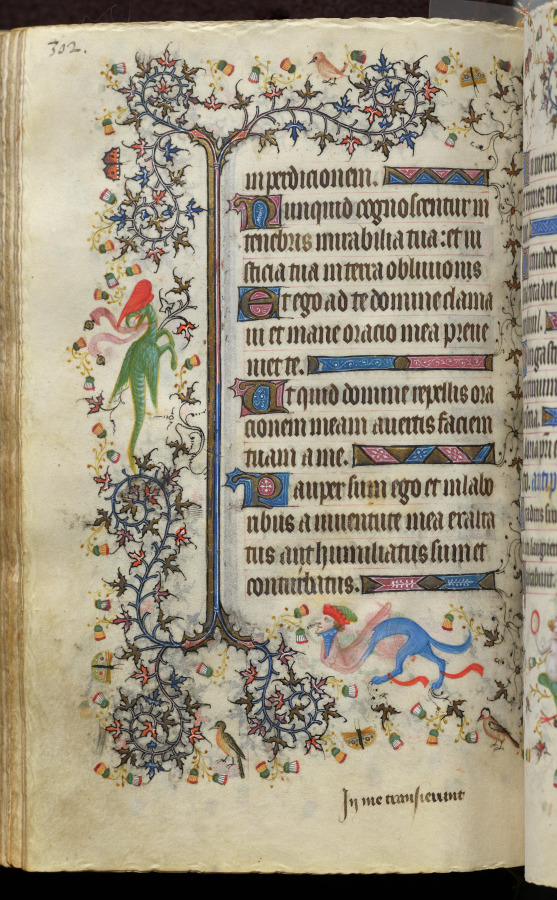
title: Hours of Charles the Noble, King of Navarre (1361-1425): fol. 151v, Text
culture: France, Paris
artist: Master of the Brussels Initials and Associates (French)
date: c. 1405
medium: ink, tempera, and gold on vellum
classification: Bound Volume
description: This precious volume was obviously highly prized by its owner, the French-born King of Navarre, who had his coat of arms painted on no less than twenty folios. Rather than directly commissioning this manuscript from a specific workshop, it seems that Charles the Noble acquired his book of hours -- perhaps ready-made for the luxury market -- while on a trip to Paris in 1404-05. A collaborative effort, six painting styles are evidenced within the pages of this codex, those of two Italians, two Frenchmen, and two Netherlanders. The painter who was responsible for the planning and decoration of the book, and who produced seventeen of the large miniatures, was a Bolognese artist known as the Master of the Brussels Initials. His principal assistant, responsible for most of the borders, was a Florentine who signed his name "Zecho" da Firenze on folio 208 verso.